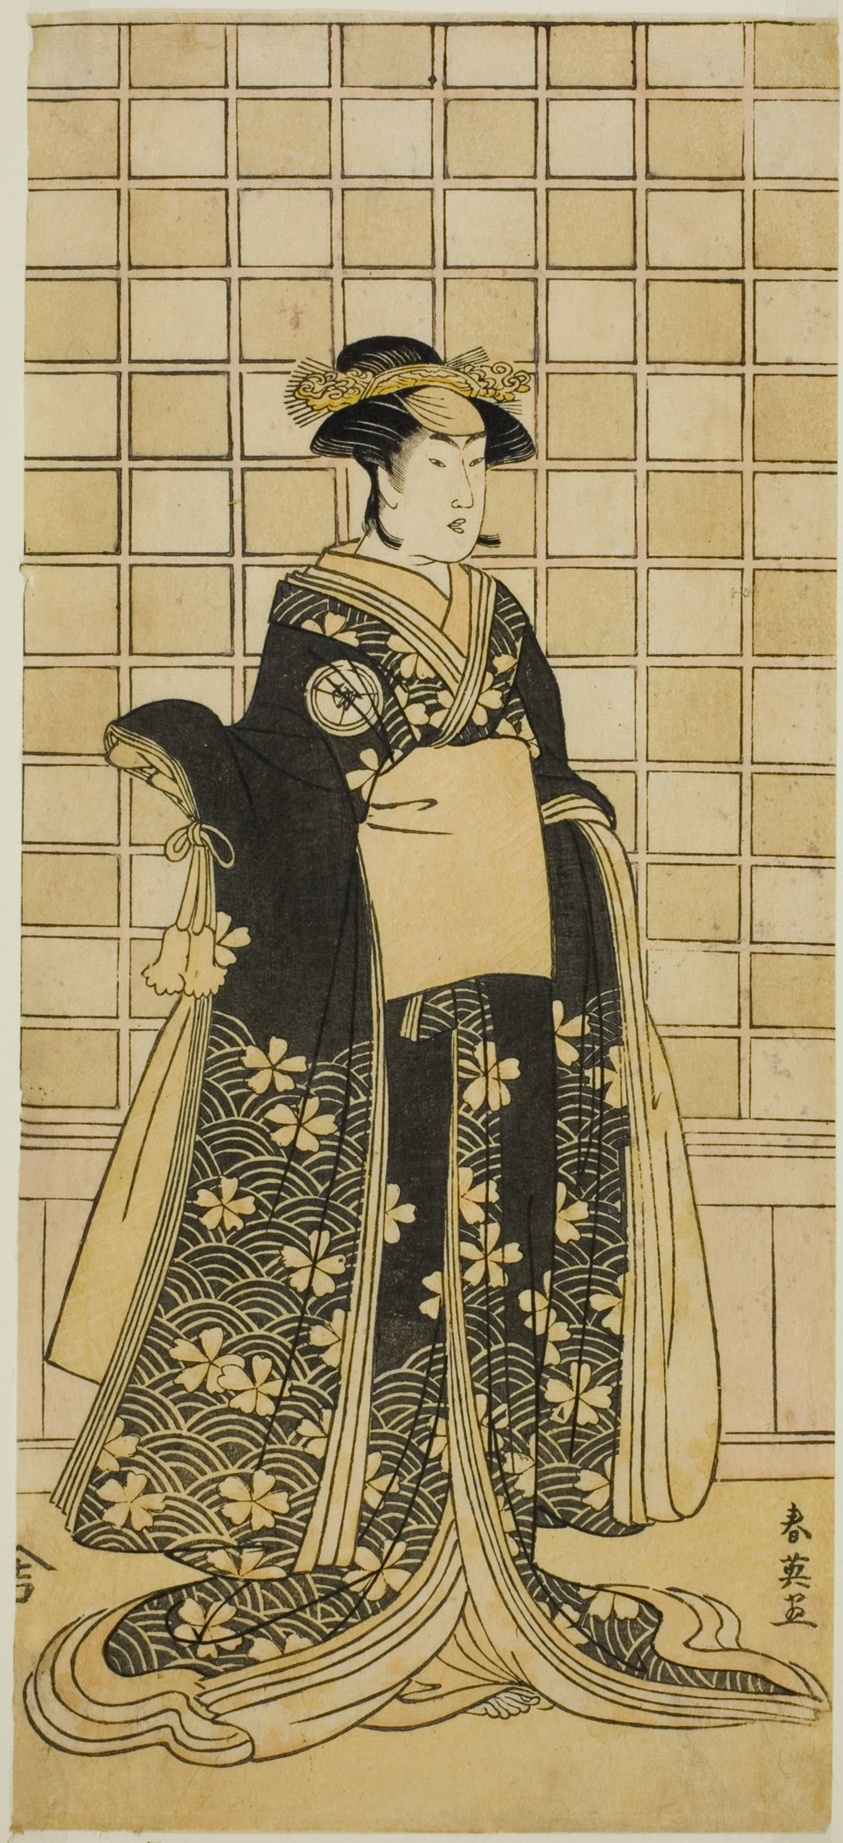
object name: Print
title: The Actor Iwai Kiyotaro II as Lady Itohagi (?) in the Play Genji Saiko Kogane Tachibana (?), Performed at the Ichimura Theater (?) in the Eleventh Month, 1788 (?)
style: Japanese (culture or style)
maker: Katsukawa Shun'ei (Japanese, 1762-1819)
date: c. 1788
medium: Color woodblock print; hosoban; left sheet of diptych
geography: Japan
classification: woodblock print; print; asian art